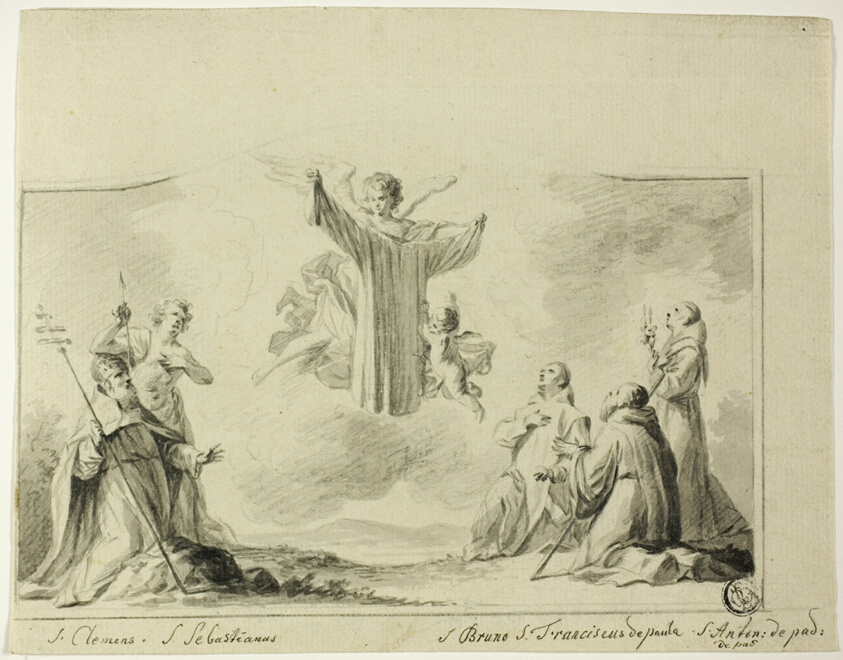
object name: Drawing and Watercolor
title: Saints Clement, Sebastian, Bruno, Francis of Paula, Anthony of Padua Worshipping Garment of the Virgin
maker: Crispin de Passe, III (Dutch, 1643-1680)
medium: Brush and gray wash, with graphite, on ivory laid paper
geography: Holland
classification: ink or chalk wash; drawings (visual works); prints and drawing